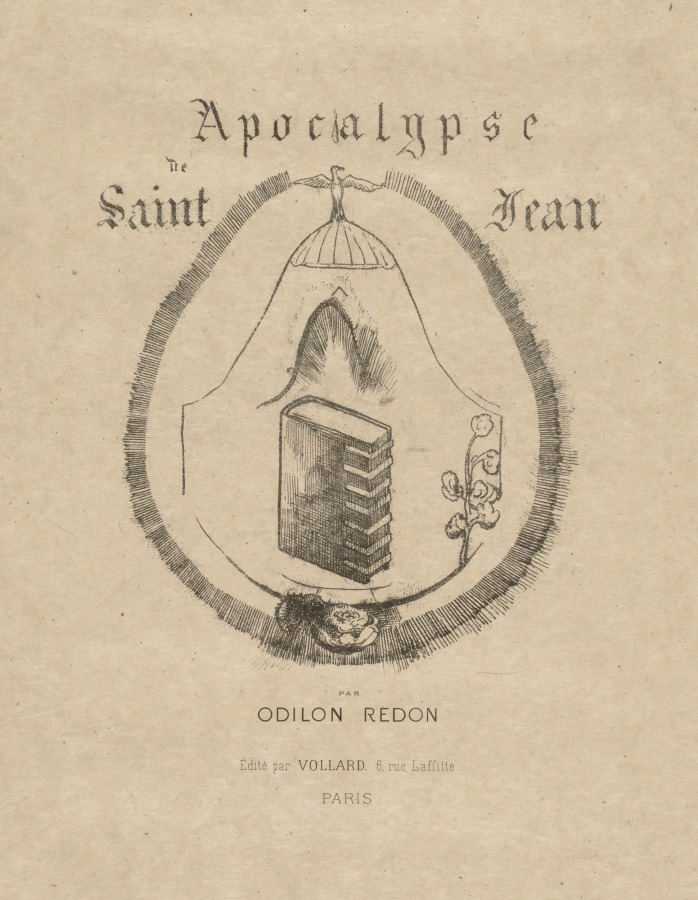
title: Cover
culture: France, late 19th Century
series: The Apocalypse of Saint John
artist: Odilon Redon (French, 1840–1916)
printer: Blanchard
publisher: Ambroise Vollard (French, 1867–1939)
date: 1899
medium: lithograph on wove paper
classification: Print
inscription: printed at center: Apocalypse / de / Saint Jean / ODILON REDON / Édité par VOLLARD, 6 rue Laffitte / PARIS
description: The last of Odilon Redon’s 11 lithographic portfolios, this series relates to the Book of Revelation from the Christian Bible. The subject had been explored throughout art history, allowing the artist to align himself with past masters, such as Albrecht Dürer. Although Redon often vaguely referenced texts, these prints directly illustrate 12 individual passages, including one about a woman clothed with the sun and another focused on a great star falling from heaven. By the time he created this portfolio, Redon’s reputation was well established. The project was published by art dealer Ambroise Vollard, who began to sell and promote Redon’s work about a year earlier, building a market for his prints in Paris and abroad.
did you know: This is one of the last works where Redon experimented with lithograph and all-black medium. In contrast, bright, dazzling colors characterize his late works.